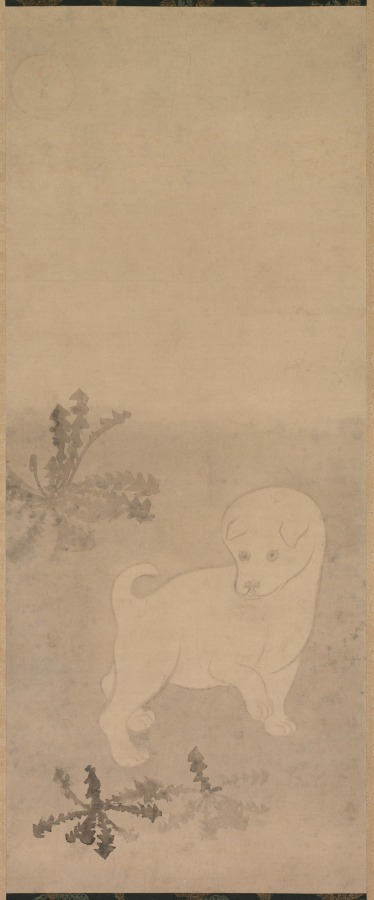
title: Puppy with Dandelions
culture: Japan, Edo period (1615–1868)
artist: studio of Tawaraya Sōtatsu (Japanese, c. 1570–c. 1640)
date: 1600–1640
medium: hanging scroll; ink on paper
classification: Painting